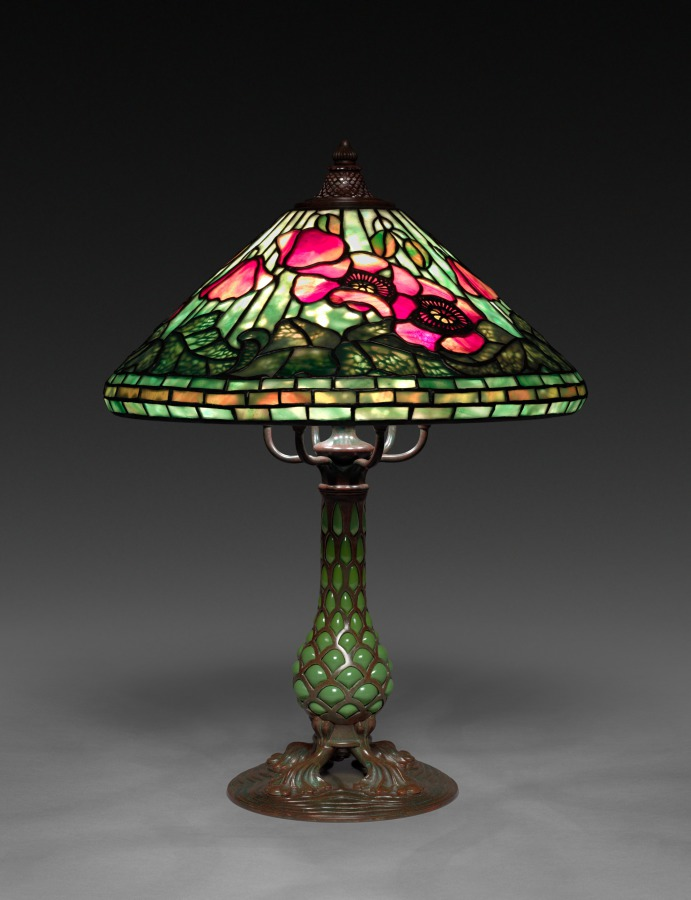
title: Poppy Filigree Table Lamp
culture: America, New York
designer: probably by Clara Wolcott Driscoll (American, 1861–1944)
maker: Tiffany Studios (United States, New York, 1902–32)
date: c.1902–10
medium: Leaded glass, blown glass, brass, bronze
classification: Lamp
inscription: Shade impressed: TIFFANY STUDIOS/NEW YORK/1431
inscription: Base impressed: TIFFANY STUDIOS/NEW YORK/28610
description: In the 1870s a renewed emphasis on natural landscapes ushered in a generation of cottage gardeners who delighted in planting perennials in large quantities. Louis Comfort Tiffany was among those who championed the lush, sometimes wild-looking displays of varied floral species in the garden at his Long Island estate, Laurelton Hall. Tiffany encouraged his designers to take inspiration from his garden by shipping fresh cuttings almost weekly to his studios. Ohio native Clara Wolcott Driscoll and her team of female designers created floral patterns for lamps and mosaics based on the colorful blooms of spring that became among the most sought after and commercially successful of Tiffany’s production.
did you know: Brass filigree layered over and underneath the glass in the Poppy lamp helps define its blossoms and leaves.